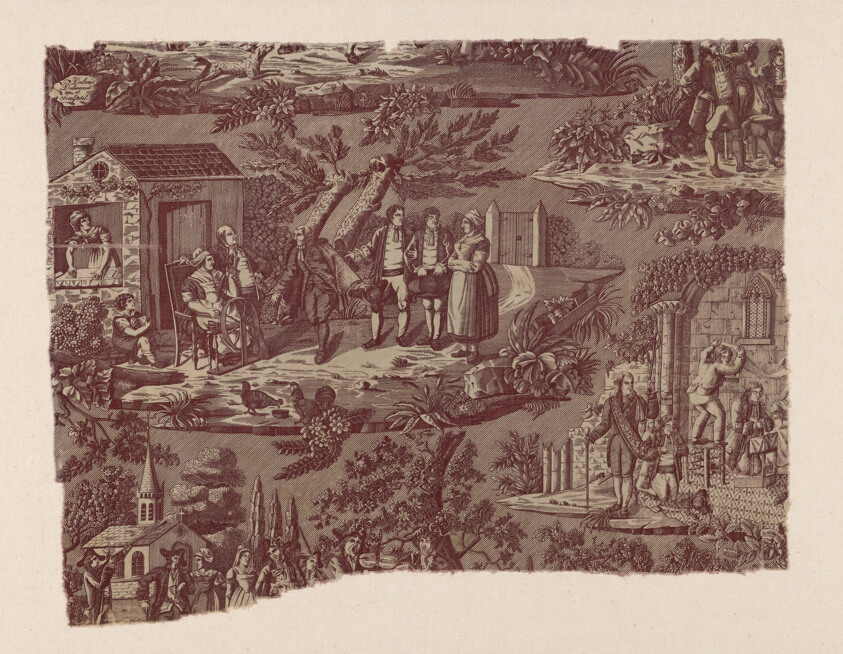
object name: Textile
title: La Noce de Campagne (The Country Wedding) (Furnishing Fabric)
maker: Designed by Delmes (French, founded 1815) after engraving by Jean Pierre Marie Jazet (French, 1788-1871) after Hippolyte Lecomte (French, 1781-1857); France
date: c. 1820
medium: Cotton, plain weave; engraved roller printed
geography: France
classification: textile; weaving - printed; furnishing textile